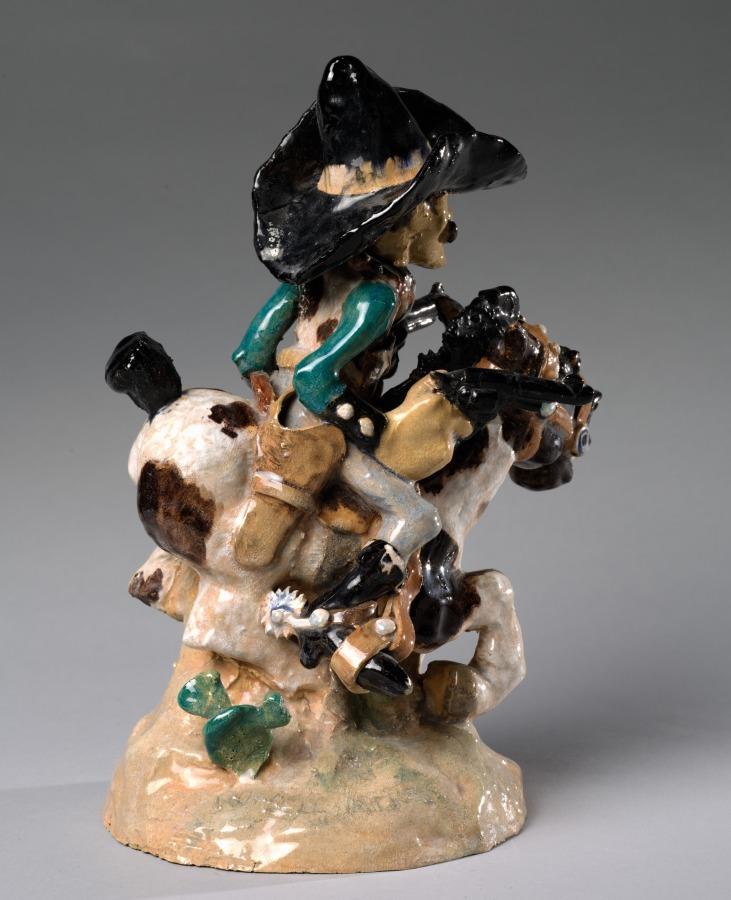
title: Sheriff of Pecos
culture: America, Ohio, Cleveland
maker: Russell Barnett Aitken (American, 1910–2002)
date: 1931–32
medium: ceramic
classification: Ceramic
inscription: Signed on the base on the back side "Russell Aitken"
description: Figural studies were emphasized in ceramics classes at the Kunstgewerbeschule, where Clevelanders Viktor Schreckengost and Russell Barnett Aitken studied in 1929–30. Aitken absorbed the Viennese style of exaggeration and caricature as seen in this depiction of a popular folk hero of the Wild West, incorporating such motifs into his work for the rest of his career.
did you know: Caricature, or the exaggeration of prominent features, was a hallmark of Russell Barnett Aitken's style of modeling figures.